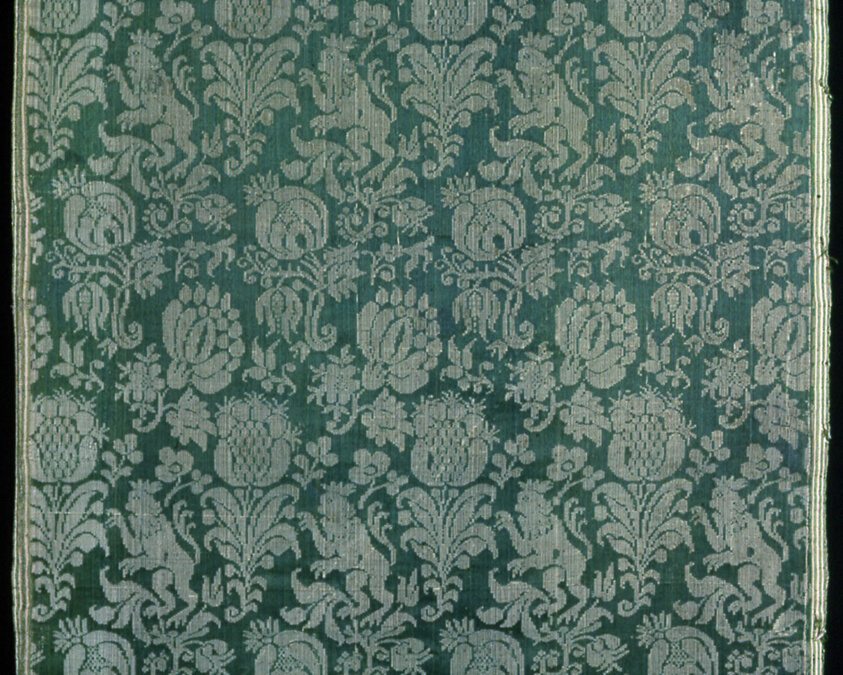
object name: Textile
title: Panel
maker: Italy, probably Florence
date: 17th century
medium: Silk, satin damask weave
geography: Italy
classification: textile; weaving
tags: flowers, animals, lions